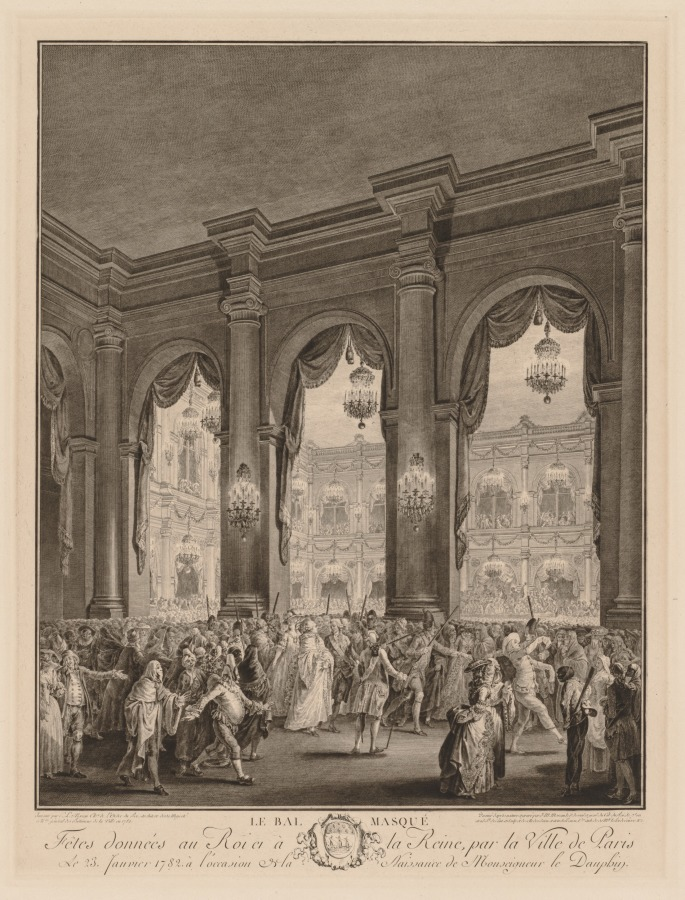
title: The Masked Ball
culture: France, 18th century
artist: Jean-Michel the Younger Moreau (French, 1741–1814)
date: 1782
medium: engraving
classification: Print